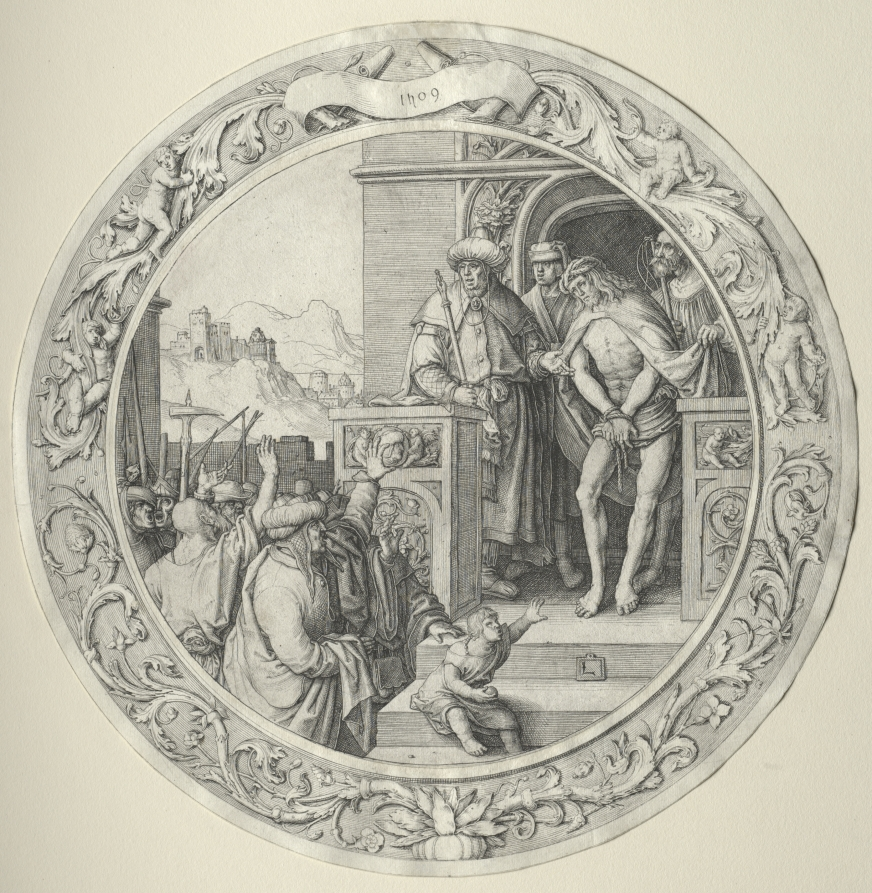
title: The Round Passion: Christ Presented to the People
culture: Netherlands, 16th century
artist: Lucas van Leyden (Netherlandish, 1494–about 1533)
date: 1509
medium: engraving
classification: Print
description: Because Lucas van Leyden usually carved his copper plates with thin, shallow lines, the plates wore down quickly; impressions this fine are especially rare. He engraved several versions of the scene of Christ presented to the people, focusing on the moment at which Christ was condemned to die on the cross. Here, he placed Christ in a shallow vestibule before an angry mob within a town and landscape setting that could be 16th-century Europe. This is one of nine engravings of the Passion of Christ in an unusual round shape; the prints feature a decorative border that was printed from a separate ring-shaped plate.